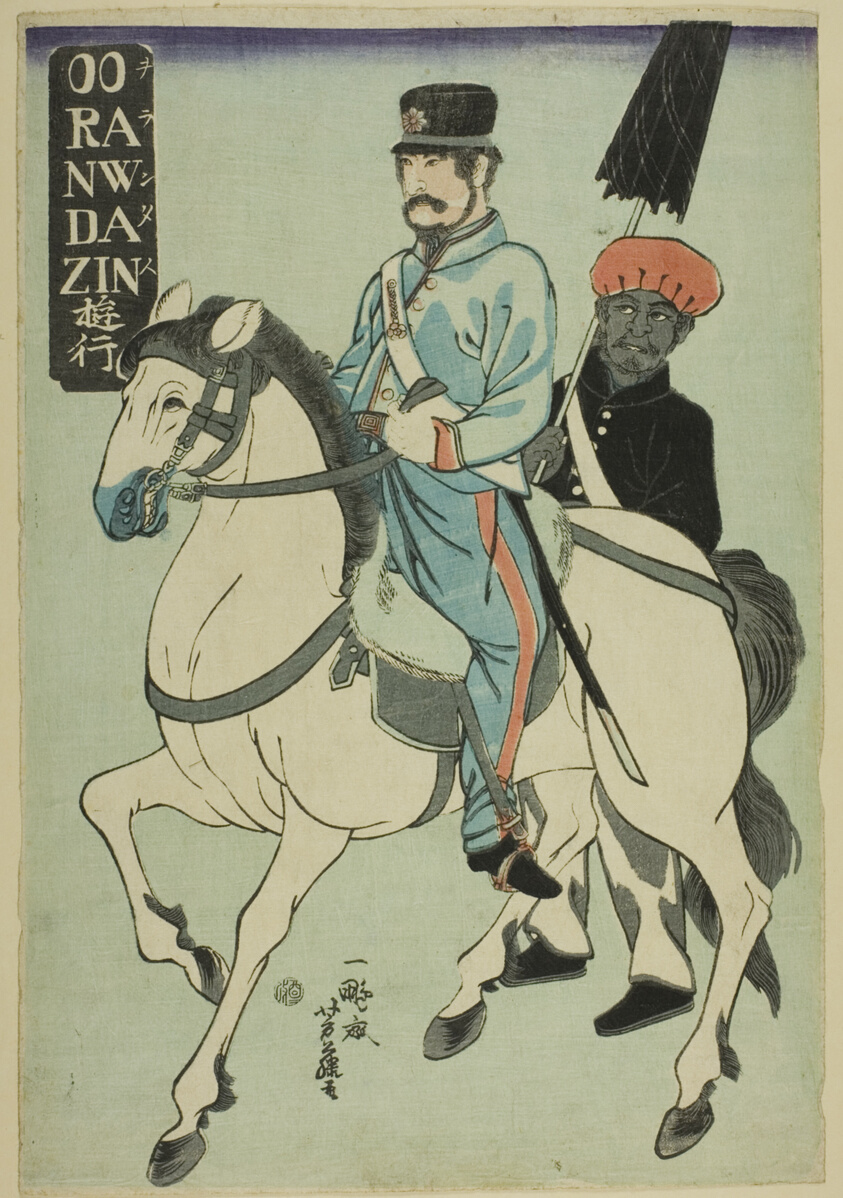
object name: Print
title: Dutchman Strolling (Orandajin yuko)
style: Japanese (culture or style)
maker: Utagawa Yoshifuji (Japanese, 1828–1887)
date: 1861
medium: Color woodblock print; oban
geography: Japan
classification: woodblock print; print; asian art